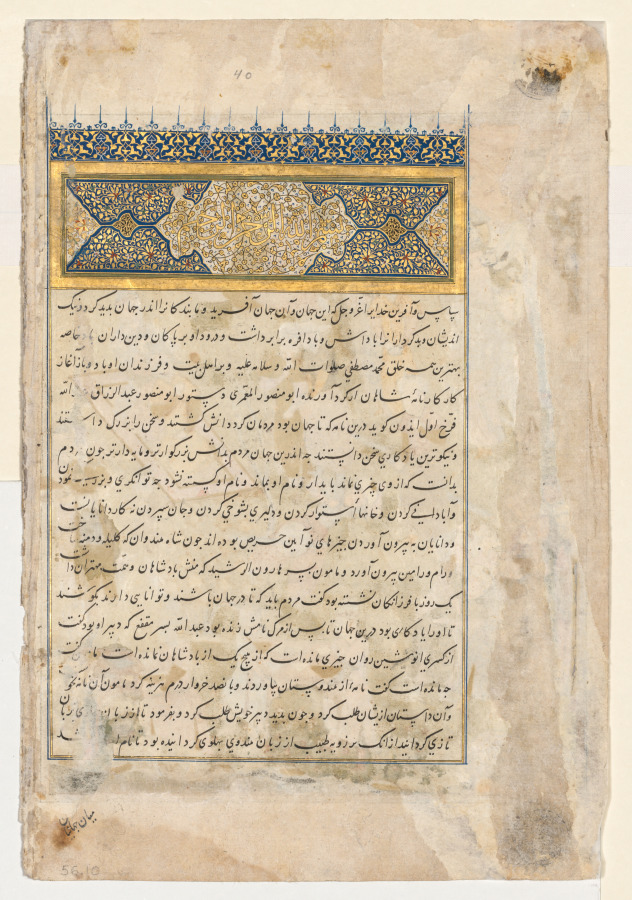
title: Preface (verso) from a double-page frontispiece of a Shahnama of Firdausi (940-1019 or 1025)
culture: Iran, Shiraz, Timurid period (1370-1501)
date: c. 1444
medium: opaque watercolor, ink, and gold on paper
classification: Manuscript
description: This text page is the first page of a Shahnama manuscript with an illuminated heading containing the basmala ("In the name of Allah, etc.") followed by the text of the preface to the Shahnama.